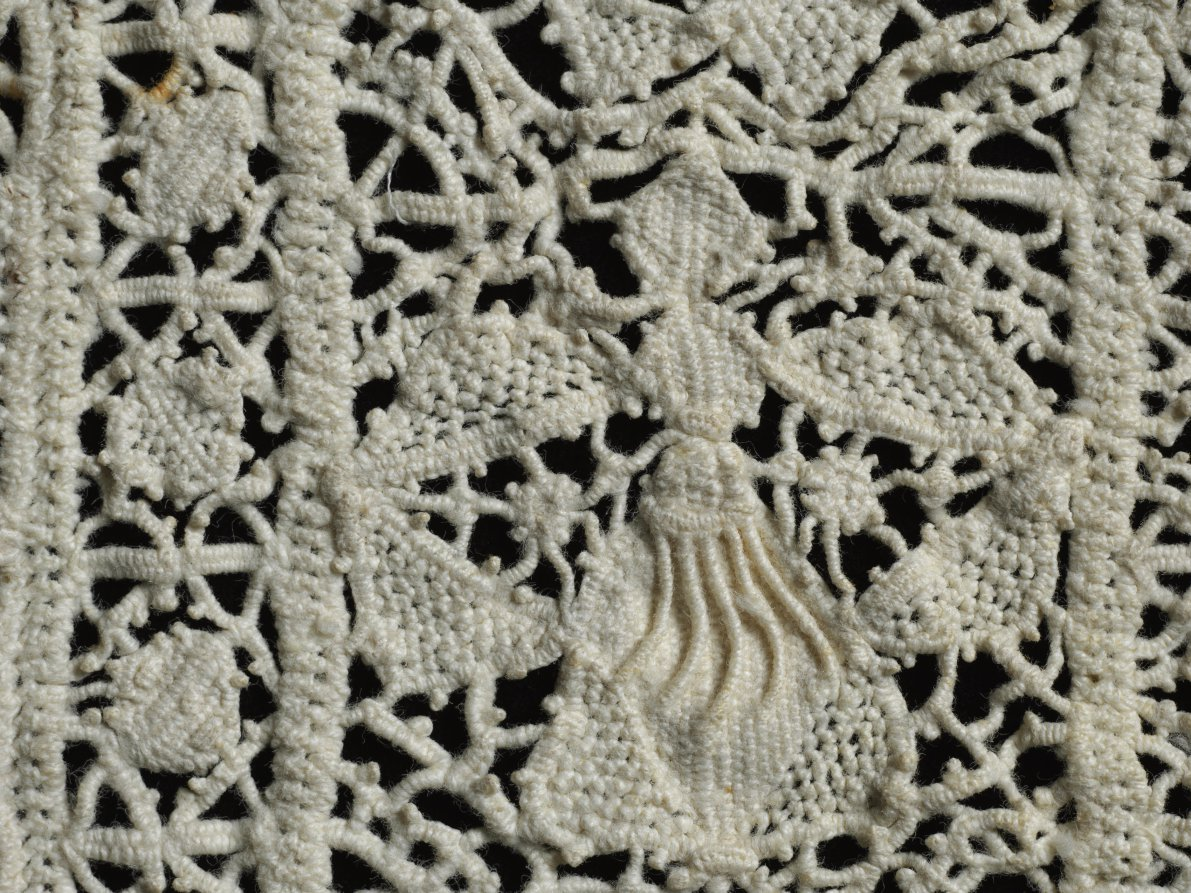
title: Lace Edging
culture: Italy, 1600s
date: 1600s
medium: Linen: needle lace (reticella)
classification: Lace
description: In this piece of lace edging, squares with a geometric design alternate with a motif of a bee, the symbol of the Barberini family.